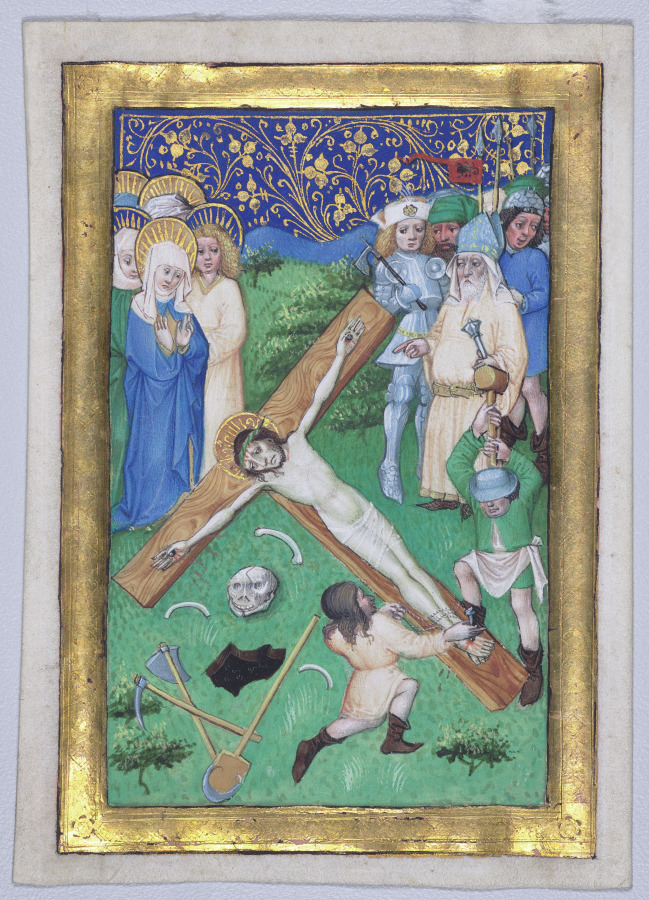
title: Leaf from a Book of Hours: Christ Being Nailed to the Cross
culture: Austria, Vienna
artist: Master of the Maximilian Schoolbooks (Austrian)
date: c. 1465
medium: ink, tempera, and gold on vellum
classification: Manuscript